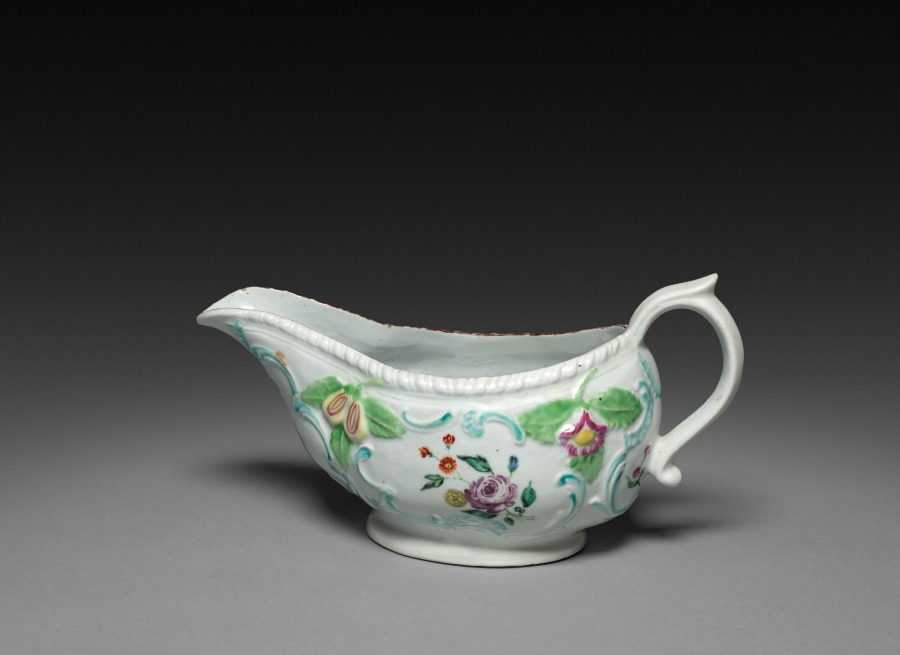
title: Sauce Boat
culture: England, Derby, 18th century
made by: Derby Porcelain Factory (British)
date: c. 1760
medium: soft-paste porcelain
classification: Ceramic